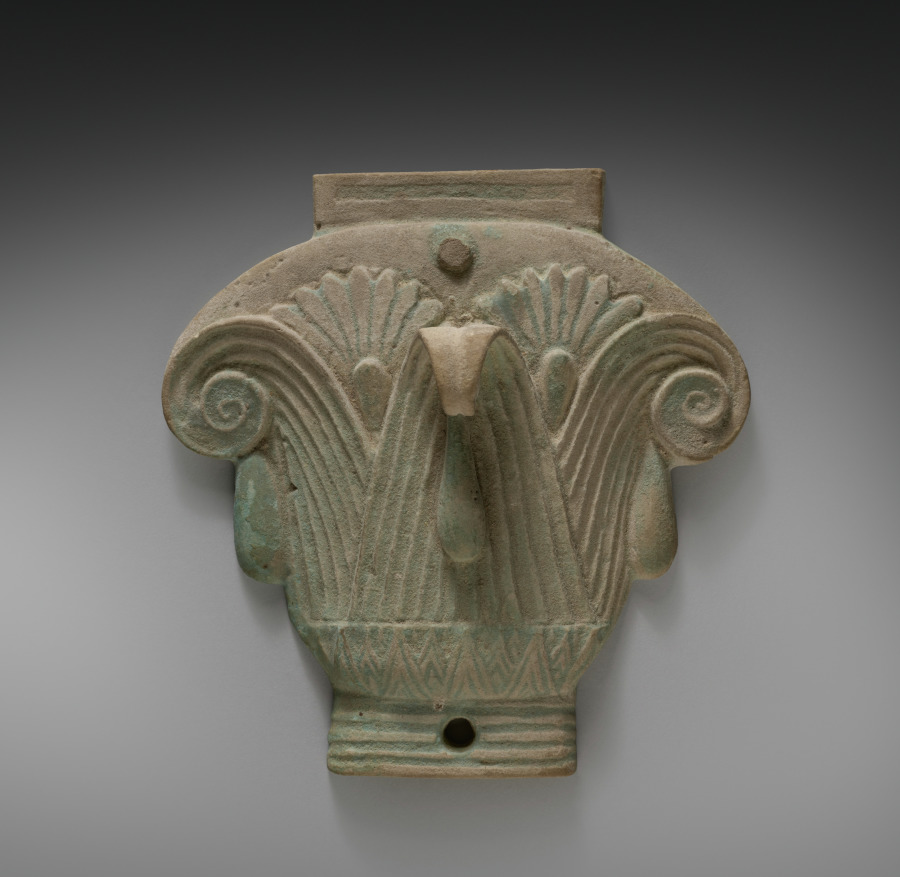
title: Box (Pyxis) in the Form of a Composite Capital (lid)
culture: Egypt, Greco-Roman period (332 BCE–395 CE), Ptolemaic dynasty (305–30 BCE)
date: 305–30 BCE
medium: pale robin's-egg blue faience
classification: Vessels